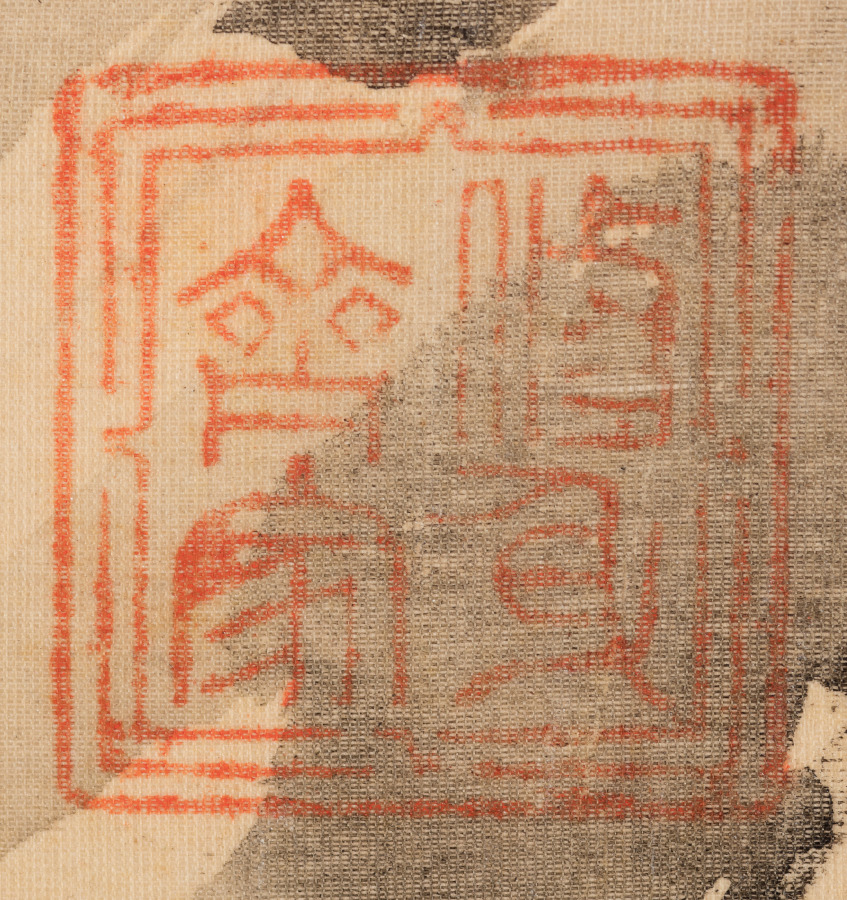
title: Orchids and Rocks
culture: Korea, Joseon dynasty (1392–1910)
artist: Yi Ha-eung (Korean, 1820–1898)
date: 1897–98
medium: Eight-panel folding screen; ink on silk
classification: Painting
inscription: Translation: [I] painted for the high minister Yangwon. [I] humbly request your corrections and advice [on my painting]. [By] an eighty-year old gentleman of rocks.)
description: Yi Ha-eung (1820−1898), the artist of this eight-panel folding screen, was one of the most influential men in late 19th-century Korea. Acting as the regent for his son, King Gojong (1852−1919), who ascended the throne at the age of thirteen, Yi ruled Korea from 1866 to 1873. In addition to his illustrious political career, Yi was also recognized as one of the most celebrated artists who led the revival of literati art in late 19th-century Korean art. In particular, he was recognized as the master of orchids, one of the “Four Gentlemen” (plum, orchid, chrysanthemum, and bamboo) themes. Solely relying on monochrome ink, Yi depicted the curvilinear silhouettes of cymbidium orchid leaves dramatically hanging down from cliffs. Growing in wilderness and redolent with fragrance, orchids were often associated with the perseverance of principled gentlemen, and thus became one of the most popular subjects of scholar-artists' paintings.On the upper right corner of the far left panel, Yi wrote a short inscription stating that he painted the work at the age of 80.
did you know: The artist of this elegant painting is the formidable politician Yi Ha-eung (1820–1898), who is known for a seclusion policy that aimed to protect Korea and its sovereignty from foreign influences.